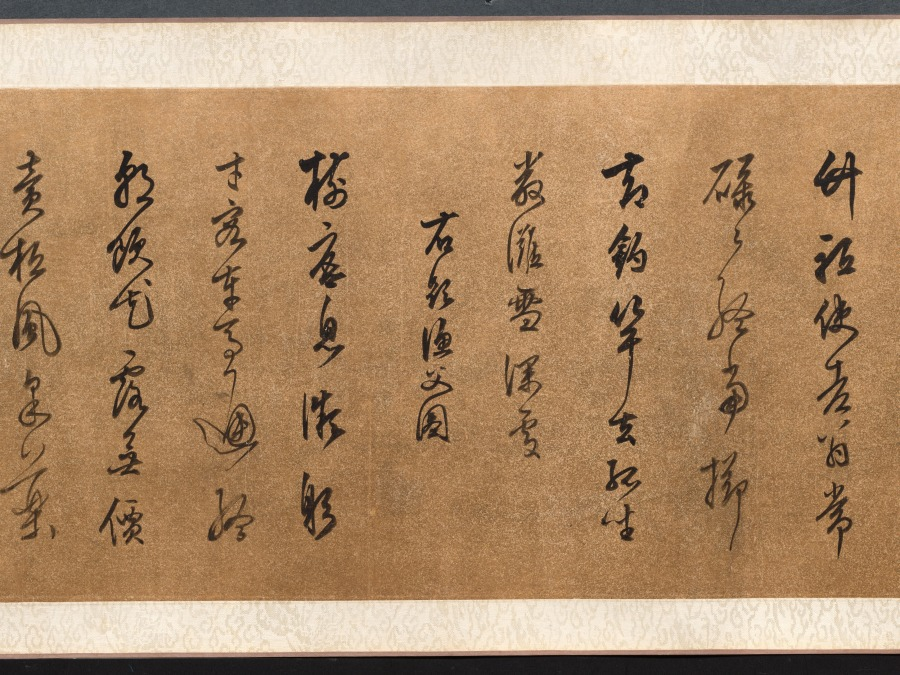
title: Four Poems: Calligraphy in Cursive Script (xingshu)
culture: China, Ming dynasty (1368–1644)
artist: Chen Jiru (Chinese, 1558–1639)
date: 1500s-1600s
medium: handscroll; ink on gold speckled paper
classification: Calligraphy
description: Written in graceful calligraphy with well-composed characters, the artist communicates his thoughts and state of mind in four poems. Characters written in dark, thick strokes convey rhythm, and indicate the moment after the writer had paused to recharge his brush with ink. Chen Jiru was a native of Huating (modern Shanghai). His calligraphy style resembles that of his friend, influential calligrapher Dong Qichang (1555–1636). Unlike Dong, Chen did not pursue government service: he burned his Confucian robes, declined a summons to serve at court, and immersed himself in literature, calligraphy, and painting.